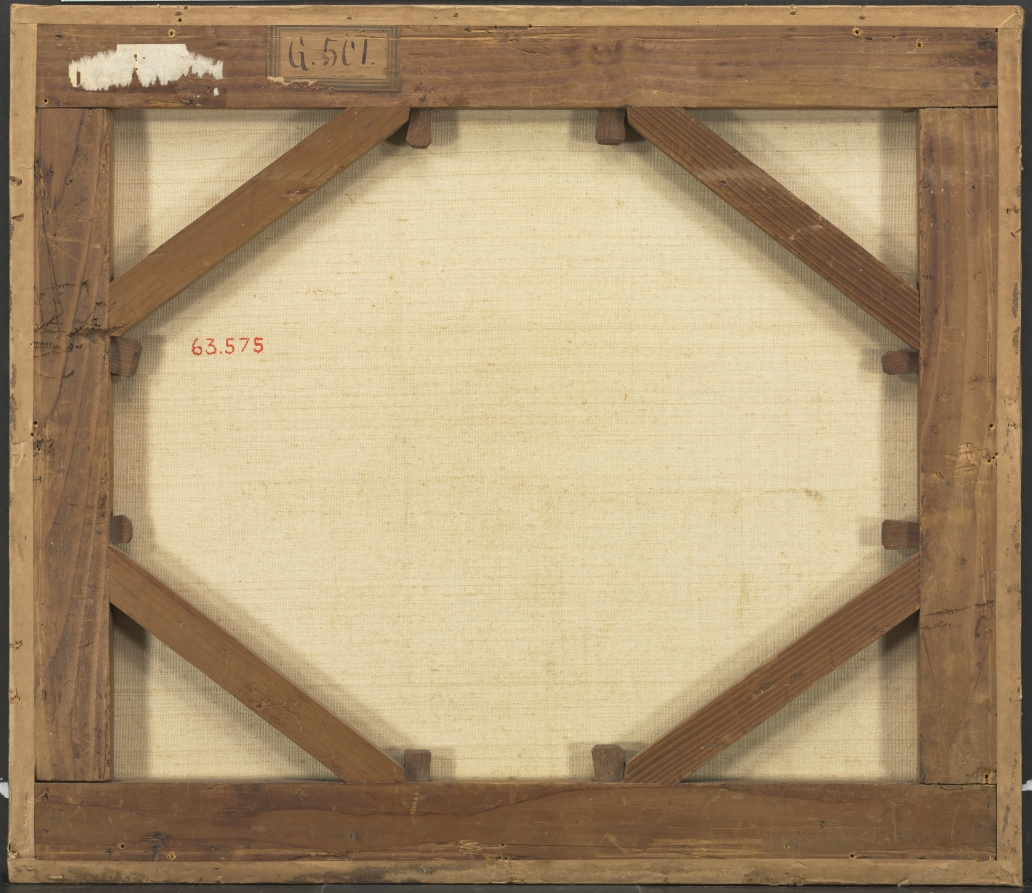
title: Wooded and Hilly Landscape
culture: Netherlands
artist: Jacob van Ruisdael (Dutch, 1628/29–1682)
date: 1660s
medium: oil on canvas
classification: Painting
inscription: Signed lower left: "JvRuisdael [JvR in monogram]"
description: Jacob van Ruisdael, one of the most eminent Dutch landscape painters, is revered for his brooding woodland compositions. With much of this painting's composition dedicated to nature alone, an underlying sense of sublimity is heightened by Ruisdael through the inclusion of several diminutive figures. A mother and child trudge through a weathered path in the foreground, their pet dog following closely at their side, while a lone traveler approaches from the foliage ahead of them. This work is an excellent representation of the artist's later period, speaking to both his preoccupation with meticulous detail and the transitory relationship between humans and nature.